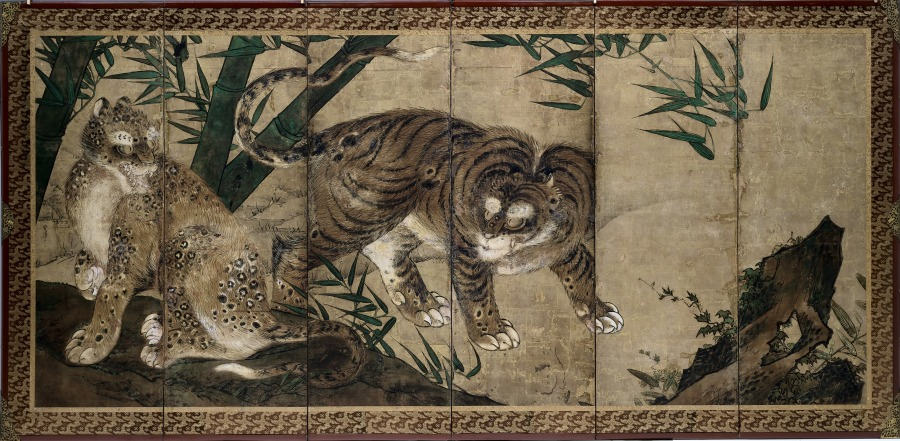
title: Lions and Tigers in Peony and Bamboo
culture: Japan, Edo period (1615–1868)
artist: Yamaguchi Sekkei (Japanese, 1644–1732)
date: 1668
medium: One of a pair of six-panel folding screens; ink and color on gilded paper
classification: Painting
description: Sekkei lived and studied painting in Kyoto at the Kano school studio, the center of traditional painting activity in Japan since 1500. The use of gold foil as a backdrop for the frolicking animals served a practical as well as a decorative function. Because traditional Japanese rooms had no windows, interior lighting came from portable oil lamps and wax candles, whose effects were magnified by reflective surfaces.